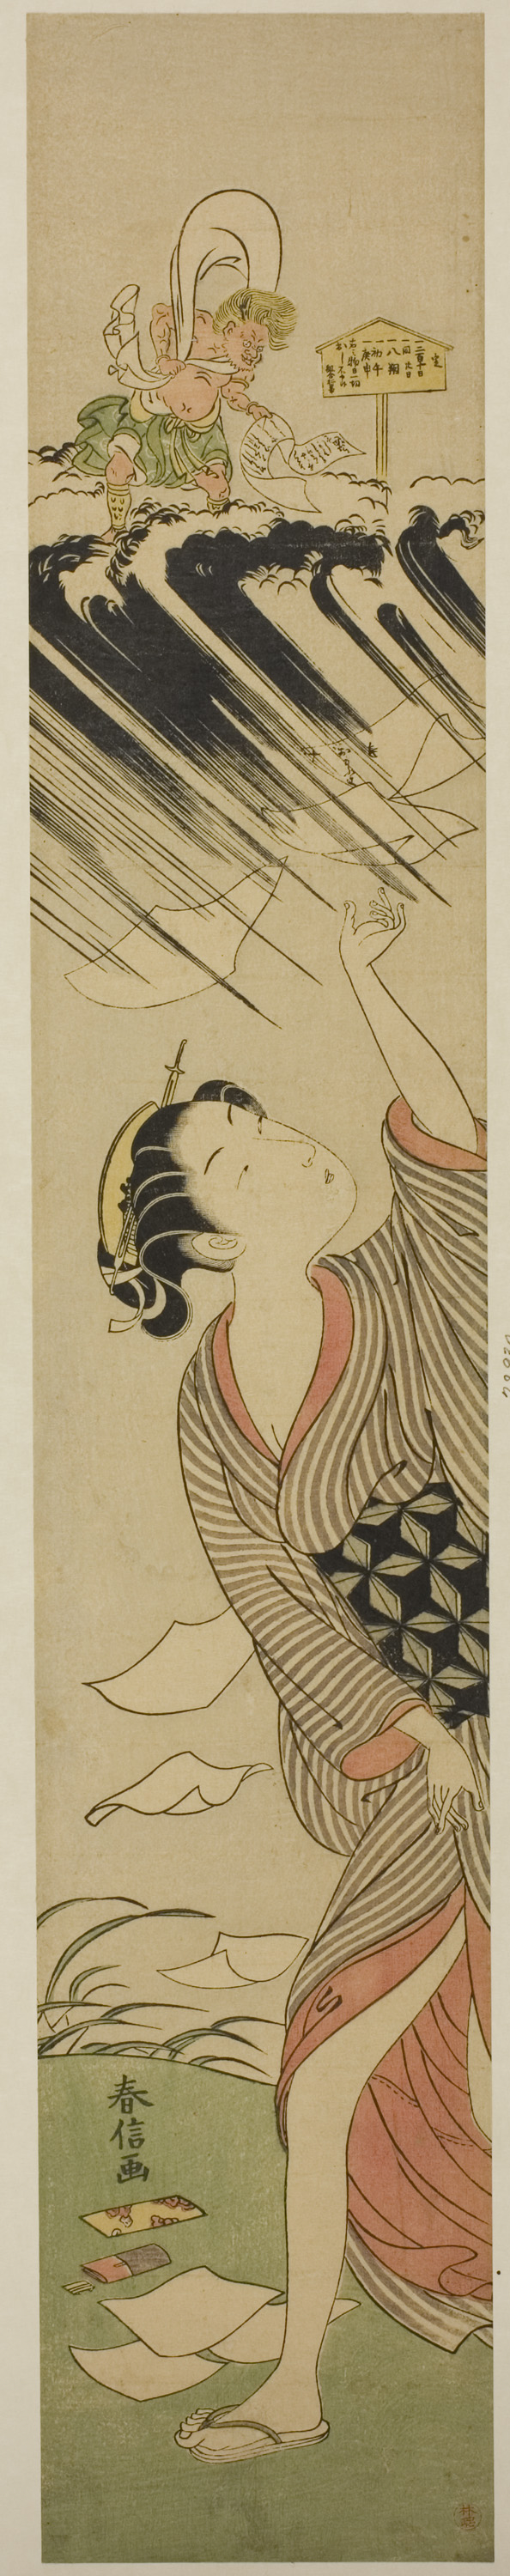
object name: Print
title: An Inauspicious Day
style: Japanese (culture or style)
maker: Suzuki Harunobu 鈴木 春信 (Japanese, 1724-70)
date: c.1769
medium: Color woodblock print; hashira-e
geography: Japan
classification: woodblock print; print; asian art